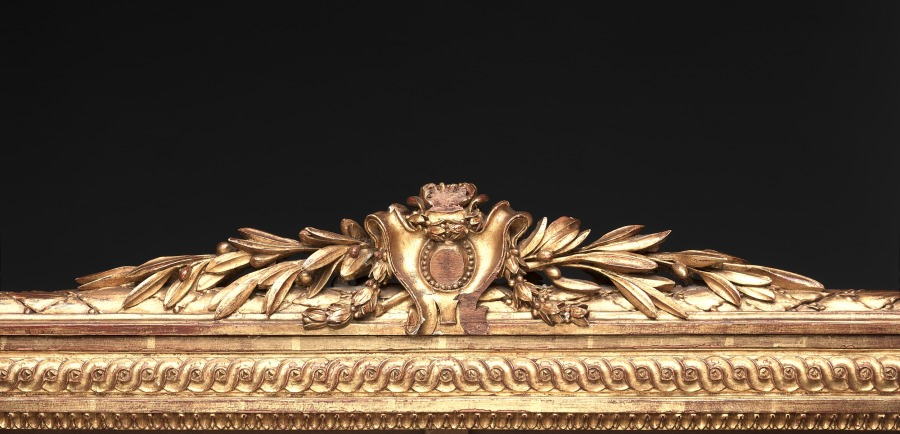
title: Fire Screen (Écran de Cheminée) and Textile Panels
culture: France, Paris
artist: Georges Jacob (French, 1739–1814)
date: c. 1780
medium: gilt wood, upholstery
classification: Furniture and woodwork